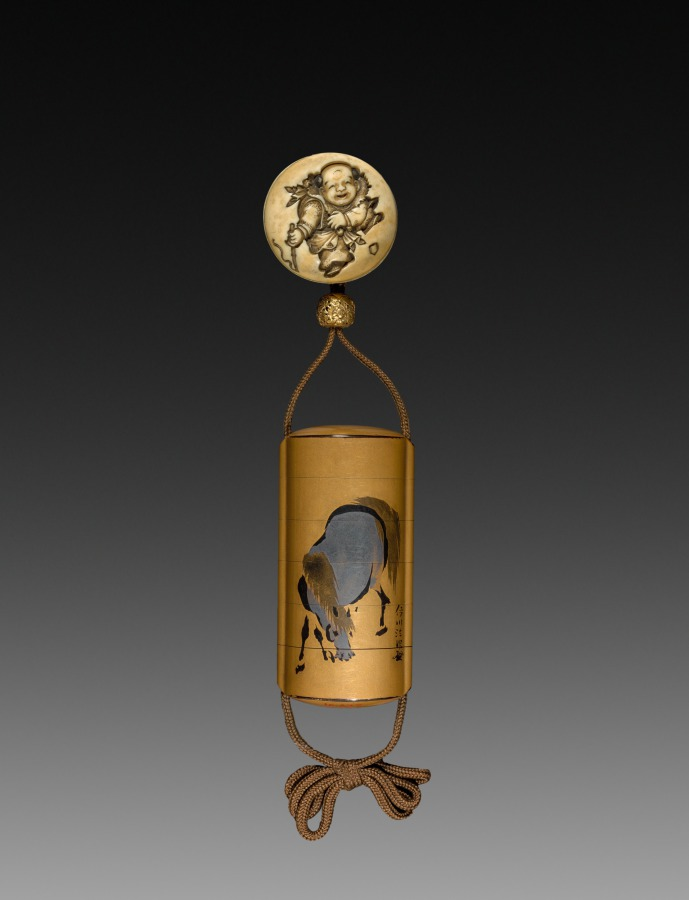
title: Inro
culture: Japan, Edo period (1615–1868)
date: early 1800s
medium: lacquer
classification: Lacquer